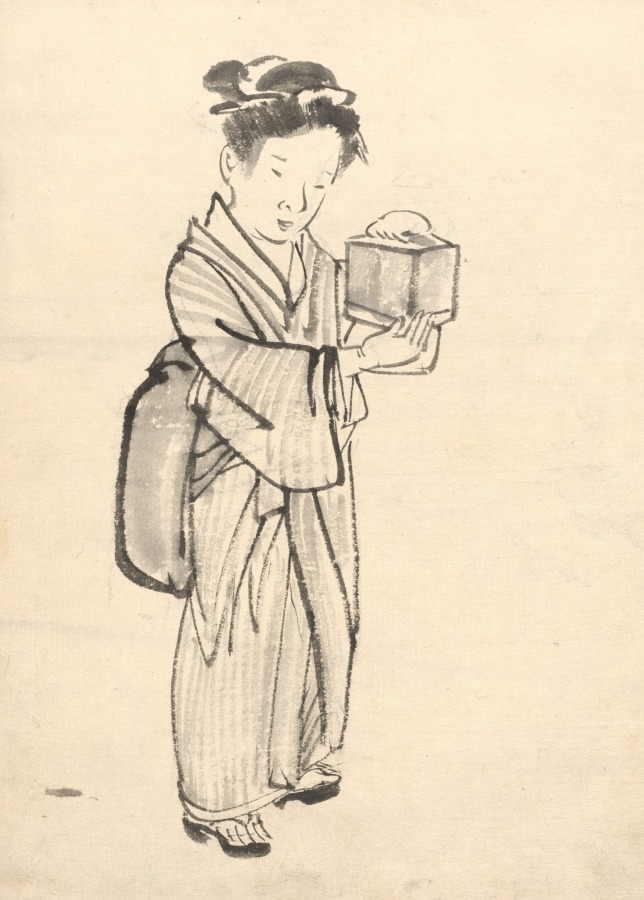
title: Girl Holding a Cricket Cage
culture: Japan, Meiji period (1868–1912)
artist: attributed to Kono Bairei (Japanese, 1844–1895)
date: c. 1880–95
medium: ink on paper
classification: Drawing